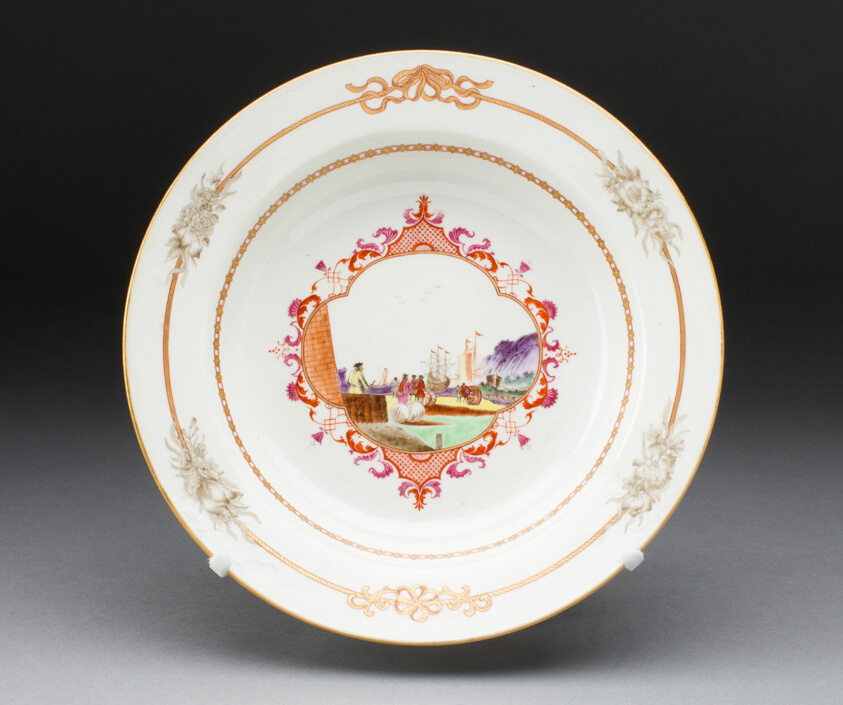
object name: Ceramics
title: Soup Bowl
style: chinese export, Chinese (culture or style), East Asian, asian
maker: China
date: c. 1750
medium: Hard-paste porcelain with polychrome enamels and gilding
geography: Jingdezhen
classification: bowl; dish (vessel); chinese export porcelain; porcelain; european decorative arts; ceramics